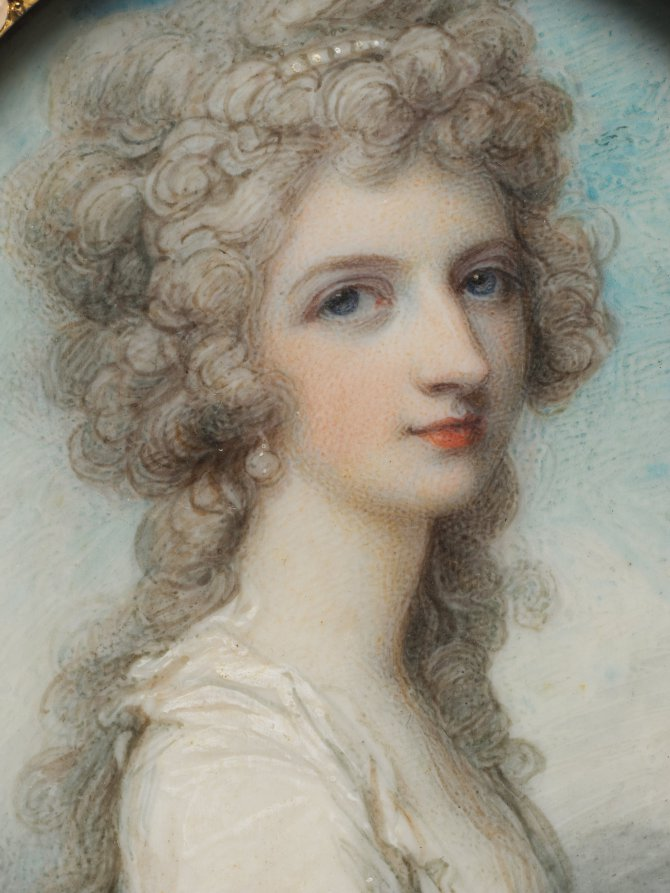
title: Portrait of Mary Frances (Fanny) Swinburne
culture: England, 18th century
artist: Richard Cosway (British, 1742–1821)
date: c. 1786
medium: watercolor on ivory in a gold, enamel, and split pearl frame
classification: Portrait Miniature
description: Mary Frances (Fanny) Swinburne (d. 1828) was the eldest daughter of the travel writer Henry Swinburne. This portrait was painted around 1786, when Richard Cosway was reaching the mature stage of his career and was among the most sought after miniature painters in London. In this work the sitter’s hair is adorned with pearls—a style commonly seen in portraits of the period. She wears an earring in her right ear. Her bright blue eyes, rosy cheeks, and red lips are accentuated by her mass of curled, powdered hair and her pale skin and gown. This work is a classic example of Cosway’s elegant female portraits, exhibiting the nearly monochromatic palette and free style that would be so decisively rejected in the next century by such artists as Andrew Robertson (1777–1845) and William Charles Ross (1794–1860). The miniature is placed in a twentieth-century revival period gold and blue enamel frame with graduated split pearls. This ornate type of frame was especially popular among early-twentieth-century collectors who felt that it suited the grandeur of miniatures by Cosway and his circle, the female portraits of which were so often composed of the pale tones of gauzy dresses, blue skies, and pearl-ornamented hair.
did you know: Richard Cosway painted Mary Frances’s parents, Henry and Martha, in the same year he painted this.